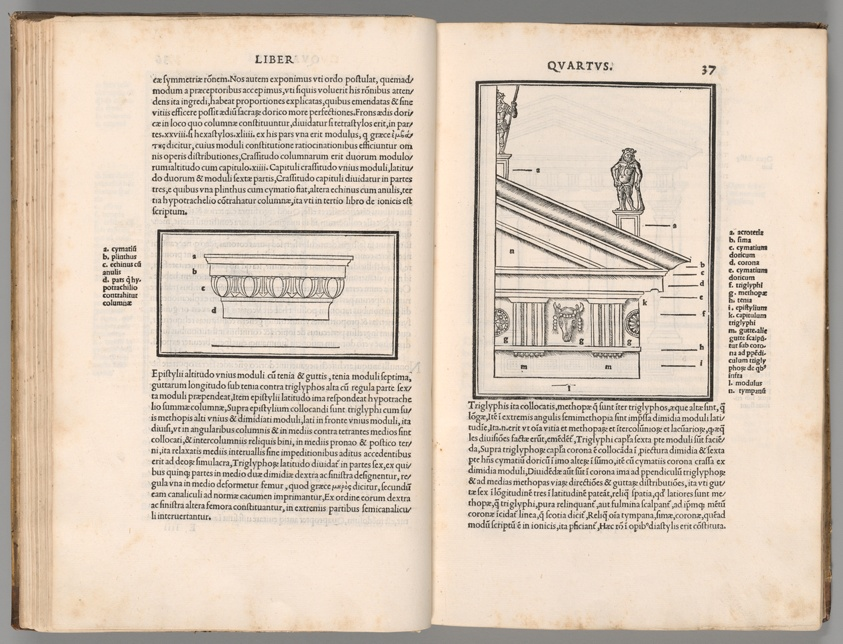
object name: Book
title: De Architectura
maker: Marcus Vitruvius Pollio (Roman, active first century BCE)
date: Venice, Italy: Ioannis de Tridino, also known as Tacuino, 1511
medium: Letterpress and woodcut in black on ivory laid paper; four-piece decorative woodcut title border with scrolling foliage and dolphin motifs; full alum-tawed ornamental leather binding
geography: Italy